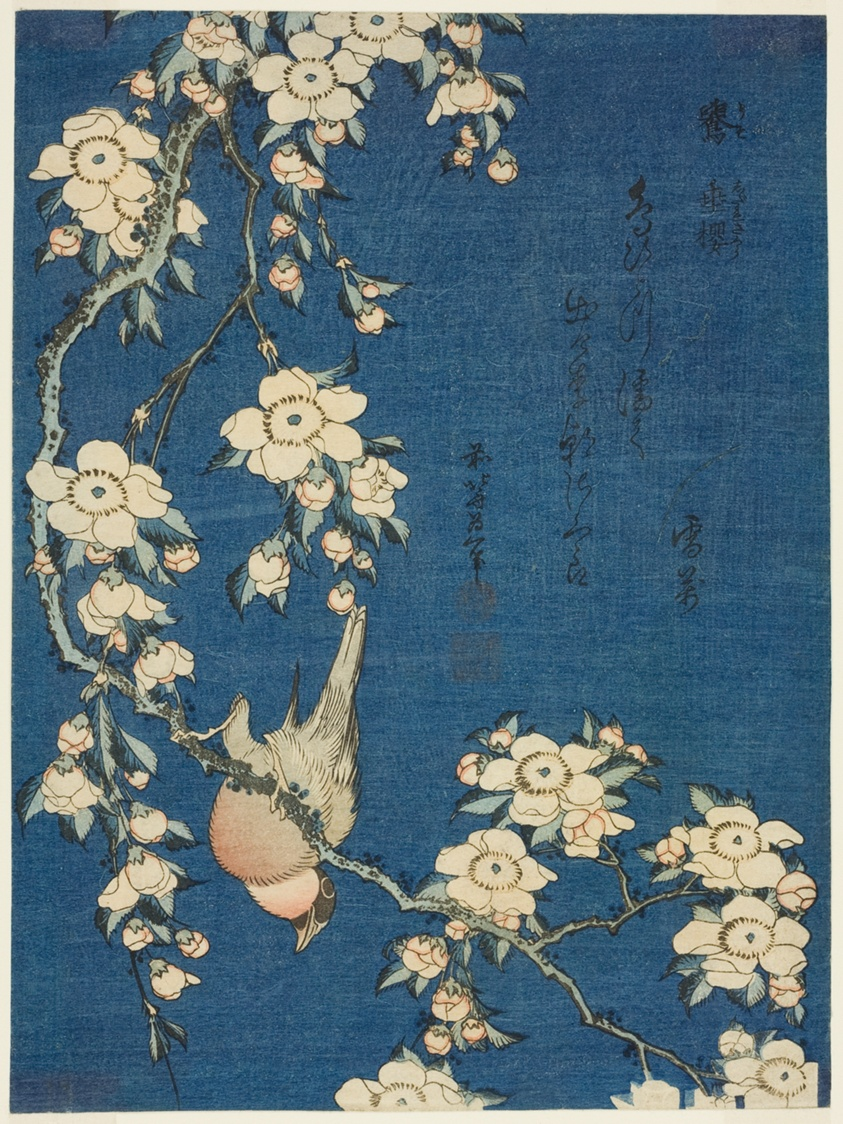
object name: Print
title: Bullfinch and Weeping Cherry (Uso, shidarezakura), from an untitled series of flowers and birds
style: Japanese (culture or style)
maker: Katsushika Hokusai 葛飾 北斎; Japanese, 1760-1849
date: c. 1834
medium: Color woodblock print; chuban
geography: Japan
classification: woodblock print; print; asian art